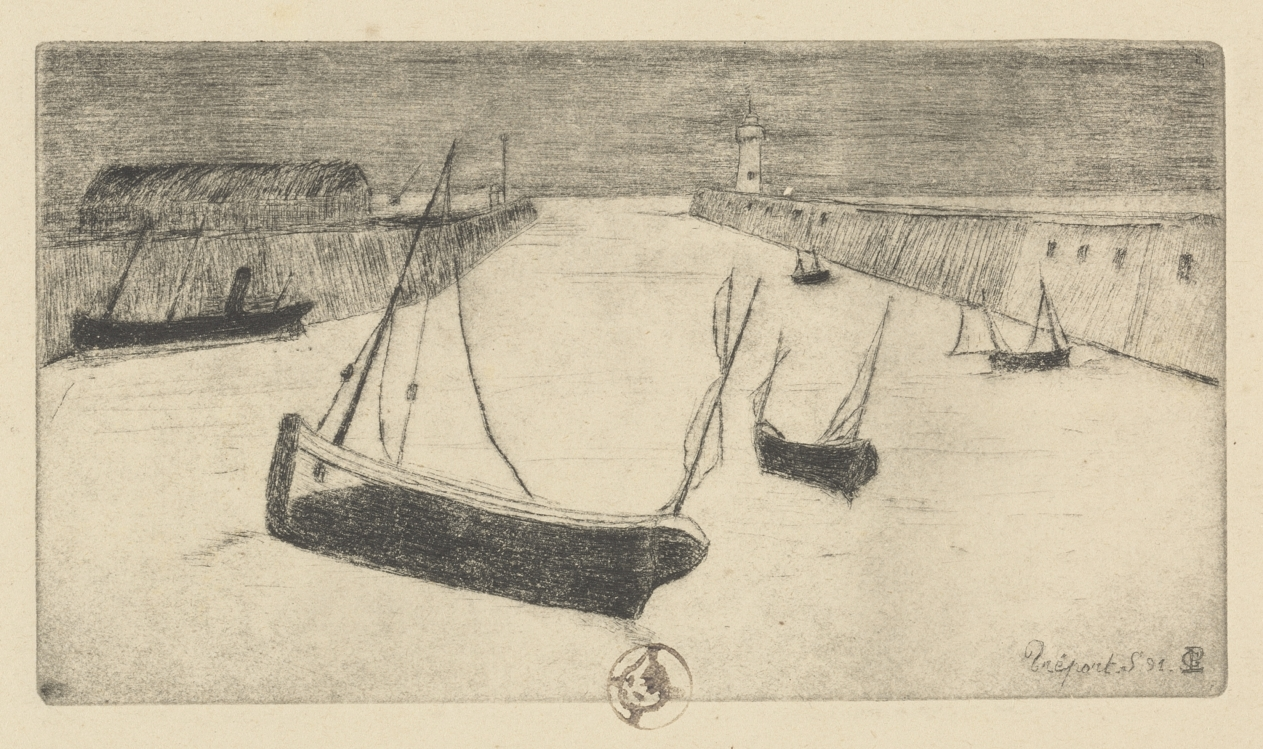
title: Six Etchings: Tréport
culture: France, 19th century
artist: Paul Gachet (French, 1828–1909)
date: 1895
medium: etching, roulette, and drypoint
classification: Print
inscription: verso, ink brown ink; Le Tréport